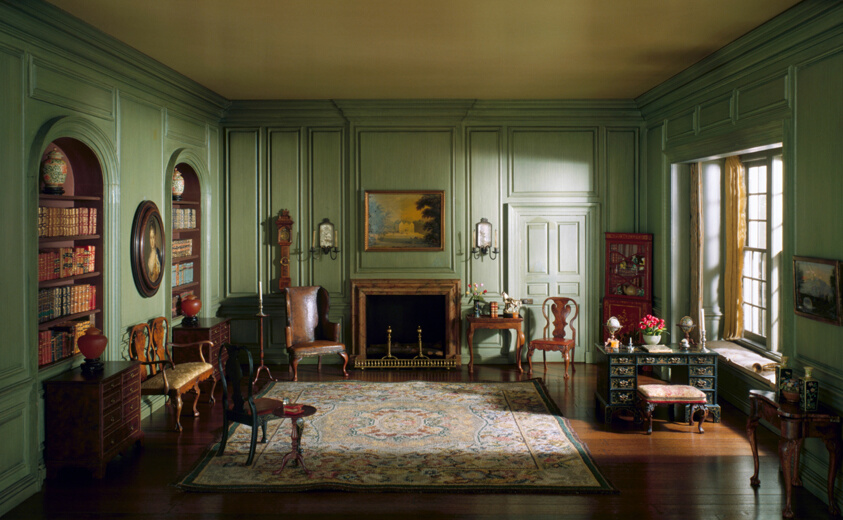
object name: Miniature room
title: E-6: English Library of the Queen Anne Period, 1702-50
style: queen anne, stuart, european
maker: Designed by Narcissa Niblack Thorne; American, 1882-1966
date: c. 1937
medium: Miniature room, mixed media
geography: United States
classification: miniature; thorne rooms